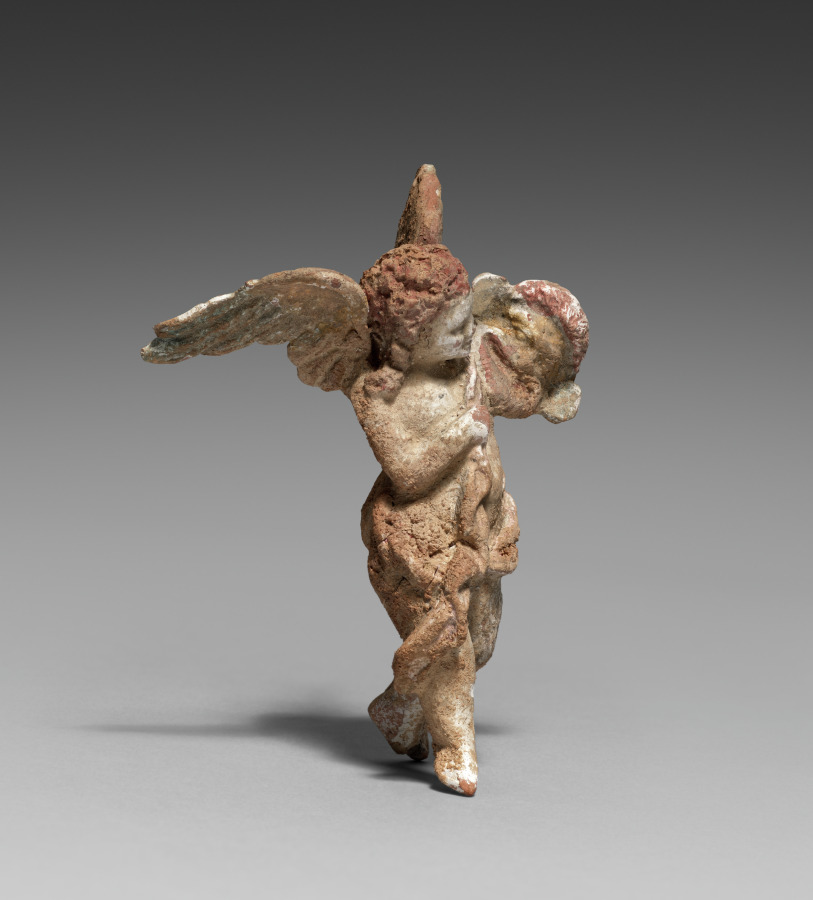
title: Figurine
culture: Greece, Myrina, Hellenistic period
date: 300–100 BCE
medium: terracotta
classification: Sculpture